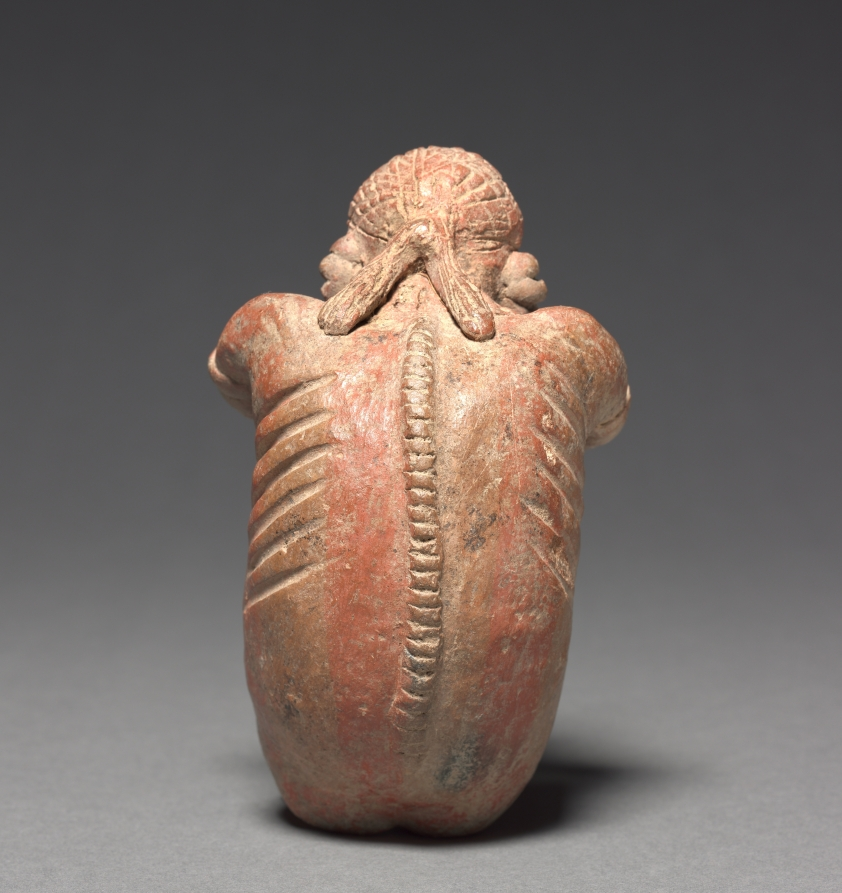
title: Emaciated Crouching Figure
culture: Mexico, Nayarit, San Sebastian Red Style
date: c. 100 BCE–300 CE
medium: earthenware with burnished red slip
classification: Sculpture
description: The protruding ribs and staring eyes of this melancholy figure may show the effects of a ritual fast, rather than famine. Fasting purified an individual in preparation for religious rites and may have enhanced the search for supernatural visions.